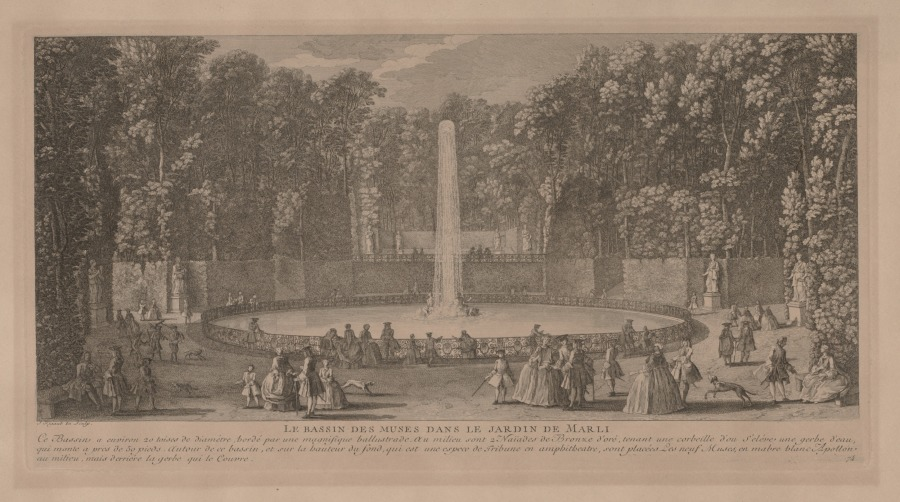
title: Pool of the Muses at Marli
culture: France, 18th century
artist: Jacques Rigaud (French, 1681–1754)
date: c. 1720–50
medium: engraving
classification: Print